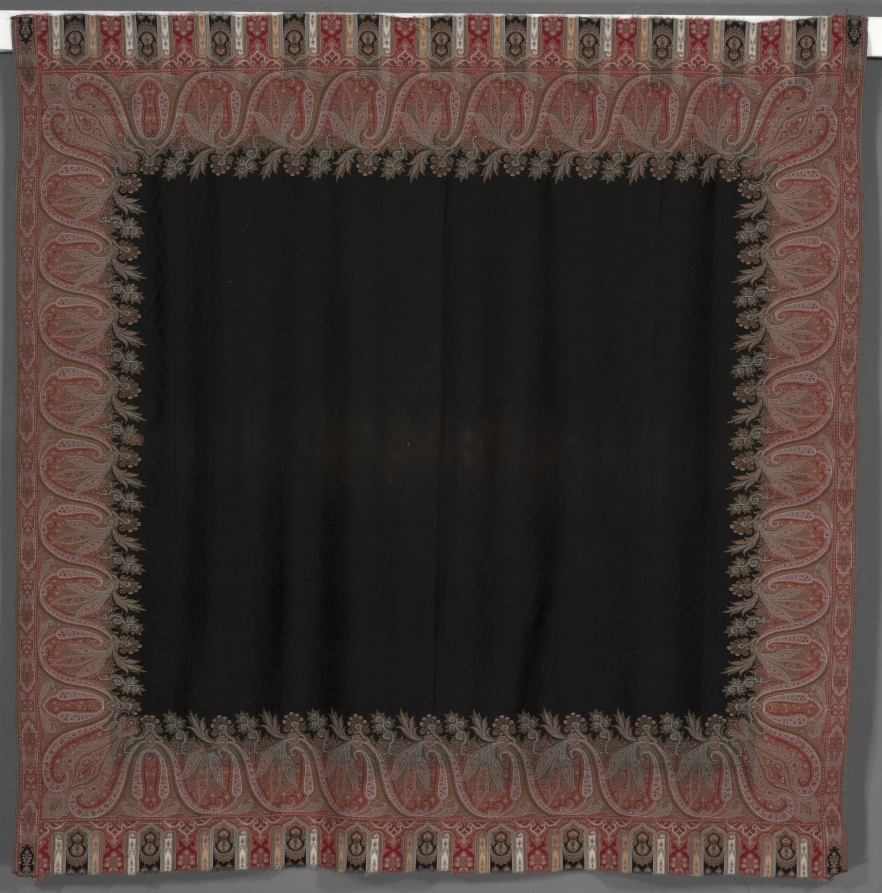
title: Square Shawl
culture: England, Norwich or France, Nimes, 19th century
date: c. 1870s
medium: wool, compound weave, additional weft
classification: Textile